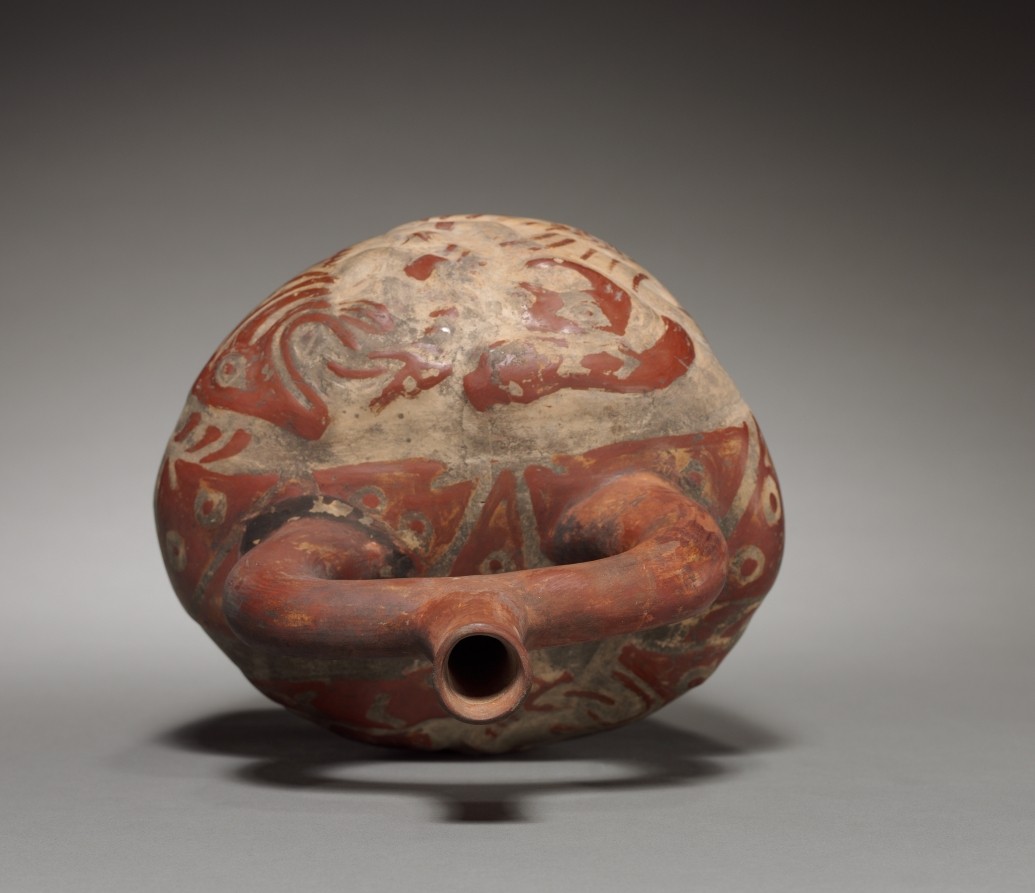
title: Bottle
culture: Peru, Chimú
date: c. 300–500 CE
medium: pottery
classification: Ceramic